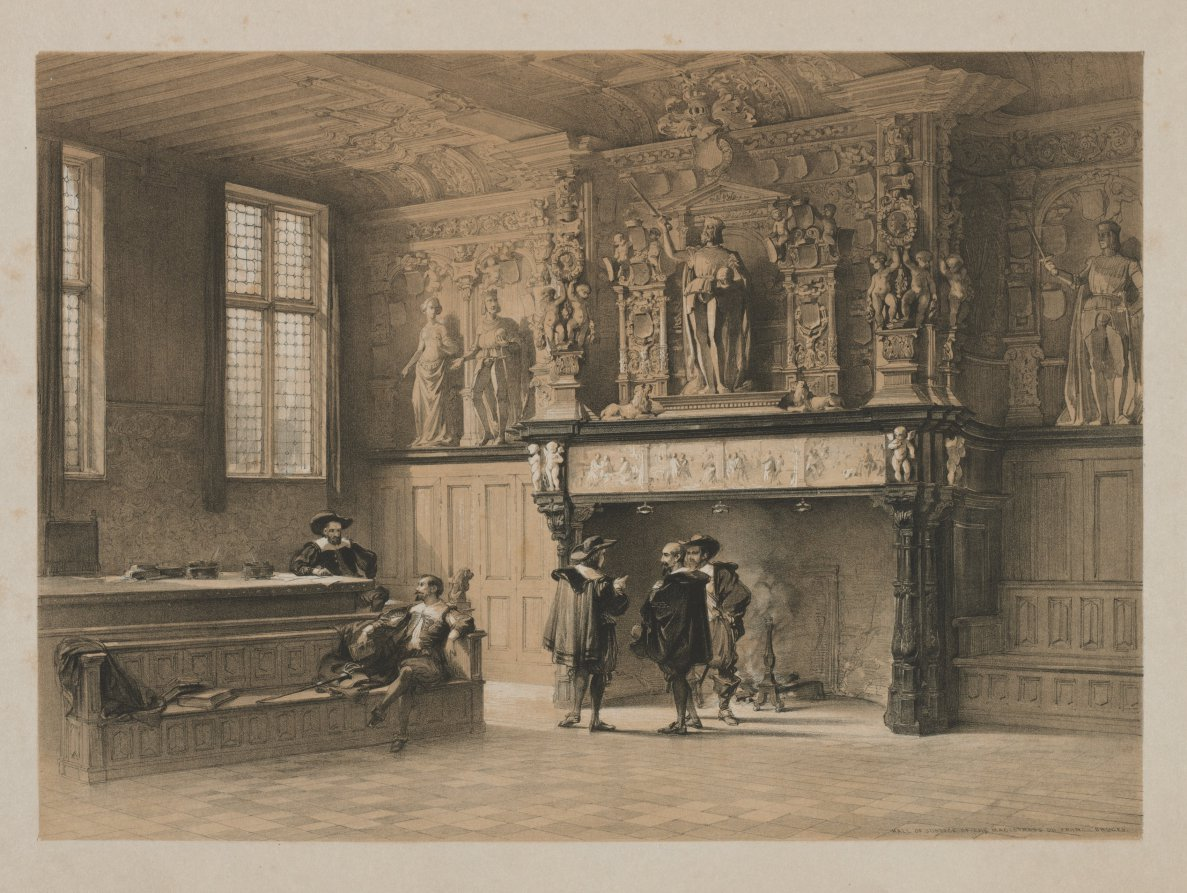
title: Sketches in Belgium and Germany, Volume I: Hall of Justice of the Magistrates du Franc, Bruges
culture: England, 19th century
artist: Louis Haghe (British, 1806–1885)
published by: Hodgson & Graves, 6 Pall Mall, London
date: 1840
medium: color lithograph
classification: Portfolio